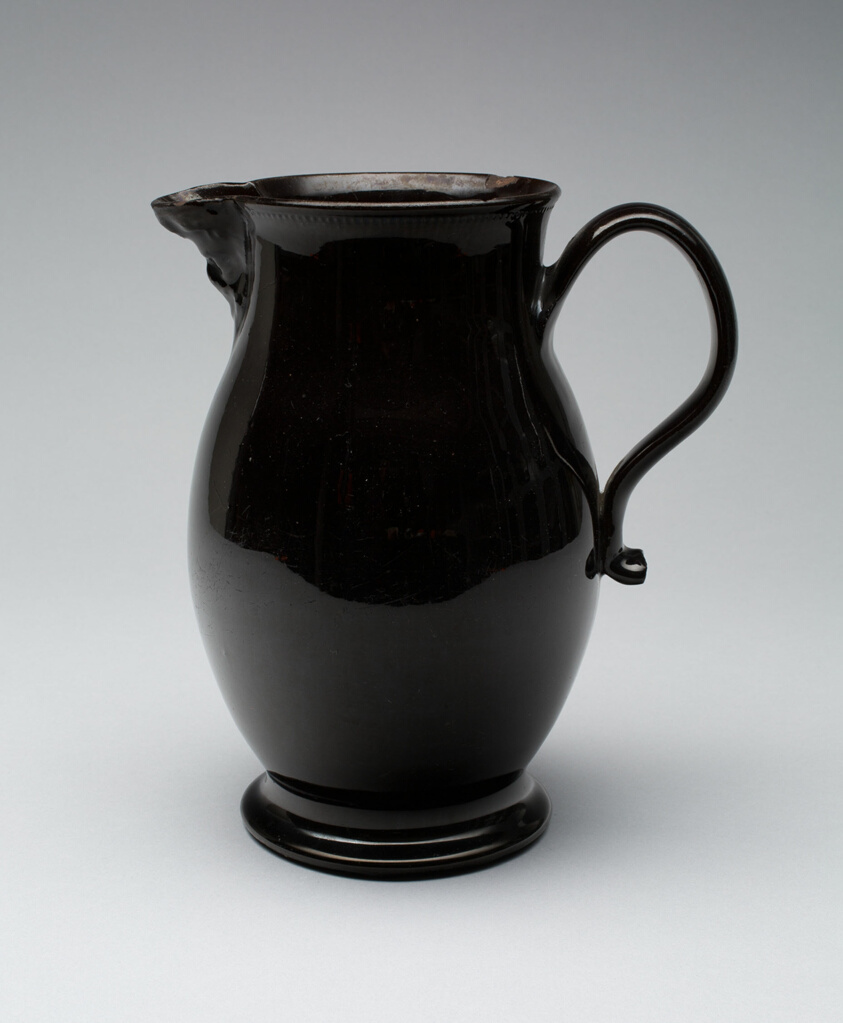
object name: Decorative Arts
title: Cider jug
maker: Artist unknown (American, 18th–19th century); Probably Pennsylvania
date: c. 1800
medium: Earthenware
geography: Pennsylvania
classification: vessel; american decorative arts; american arts; ceramics; decorative arts